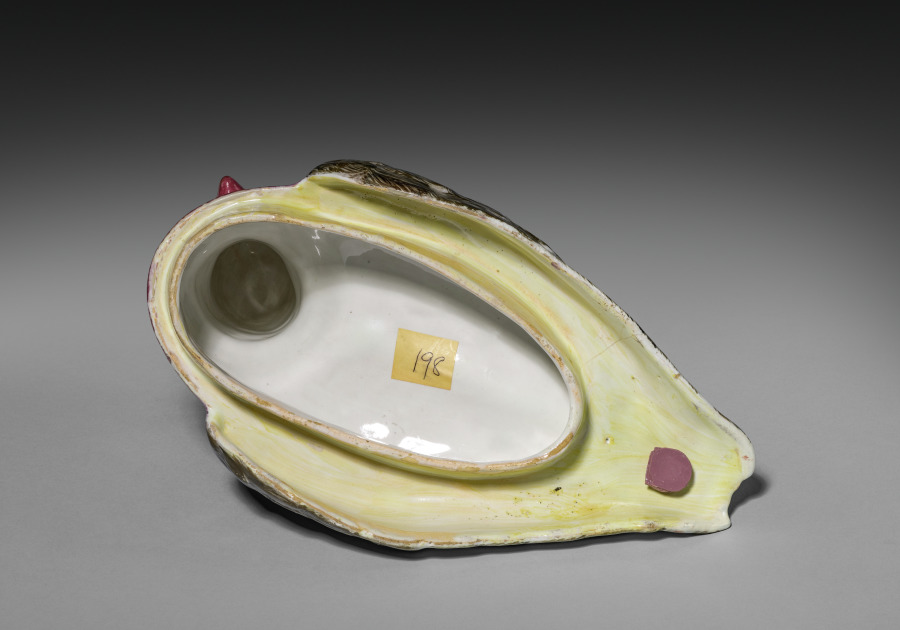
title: Cover for a Tureen in the Form of a Pigeon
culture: France, 18th century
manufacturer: Sceaux Factory (French, active 1748–66)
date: c. 1760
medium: Tin- glazed earthenware (faience) wth enamel decoration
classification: Ceramic